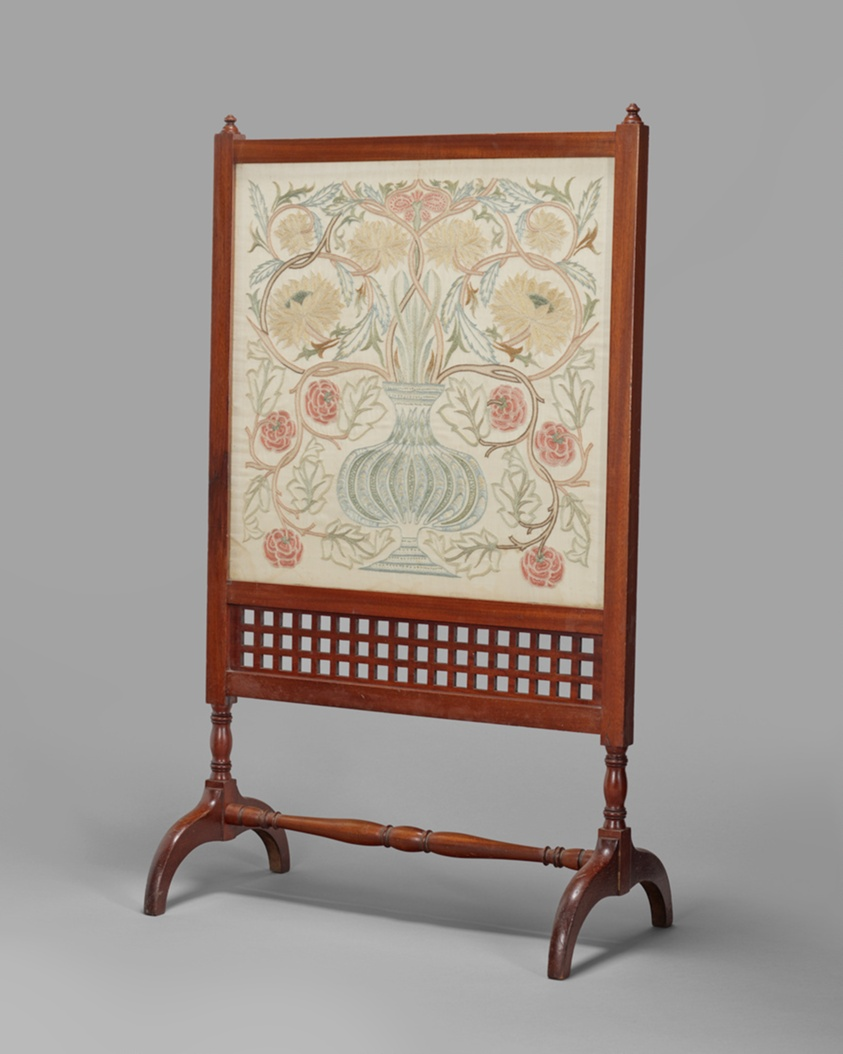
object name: Coverings and Hangings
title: Flowerpot Fire Screen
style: Arts and Crafts Movement, 19th century, british, British Arts and Crafts Movement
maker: Designed by William Morris (English, 1834-1896); Produced by Morris & Co., London (English, 1875–1940)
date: Design early 1880s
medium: Wood, cotton or linen ground, silk floss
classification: embroidery; fire screen (furniture); textile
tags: flowers, vase, foliage